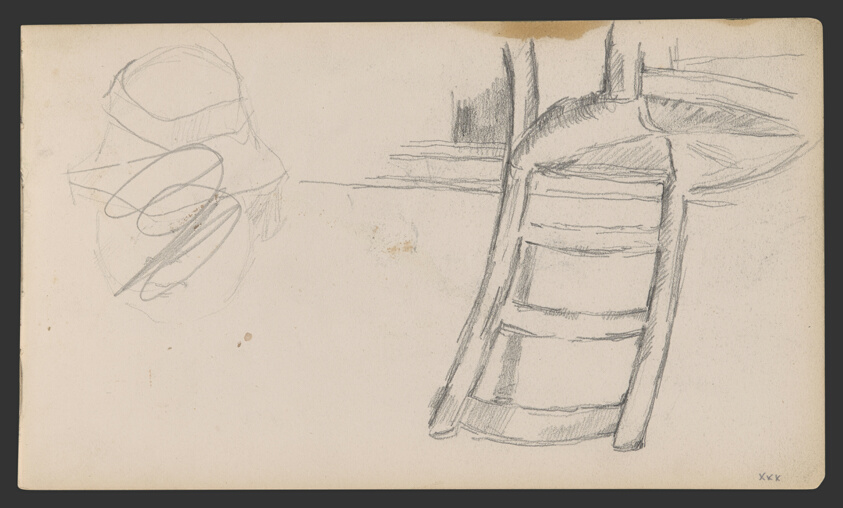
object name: Drawing and Watercolor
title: Sketchbook No. 2 (L'Estaque)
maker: Paul Cézanne; French, 1839-1906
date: 1875–86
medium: Graphite and pen and ink drawings on paper, bound into a book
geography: France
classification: sketchbook; graphite; prints and drawing; paper